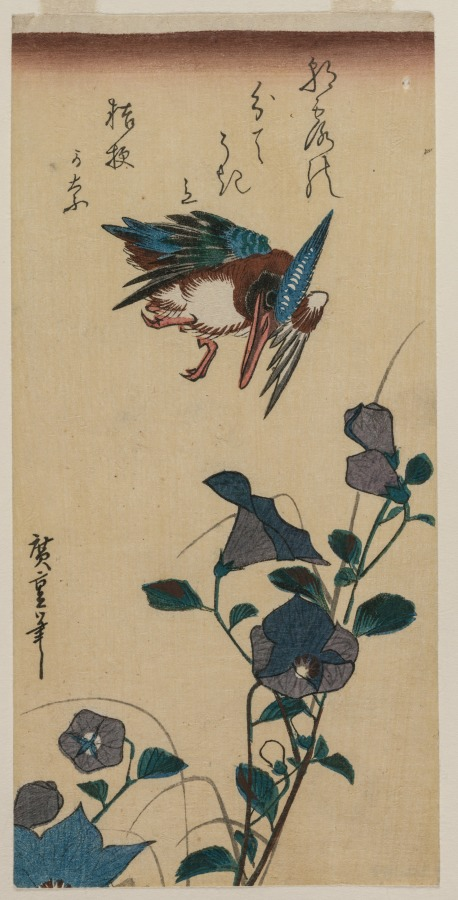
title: Kingfisher and Chinese Bellflowers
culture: Japan, Edo period (1615–1868)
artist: Utagawa Hiroshige (Japanese, 1797–1858)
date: early or mid-1830s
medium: color woodblock print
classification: Print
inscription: Signature: Hiroshige hitsu